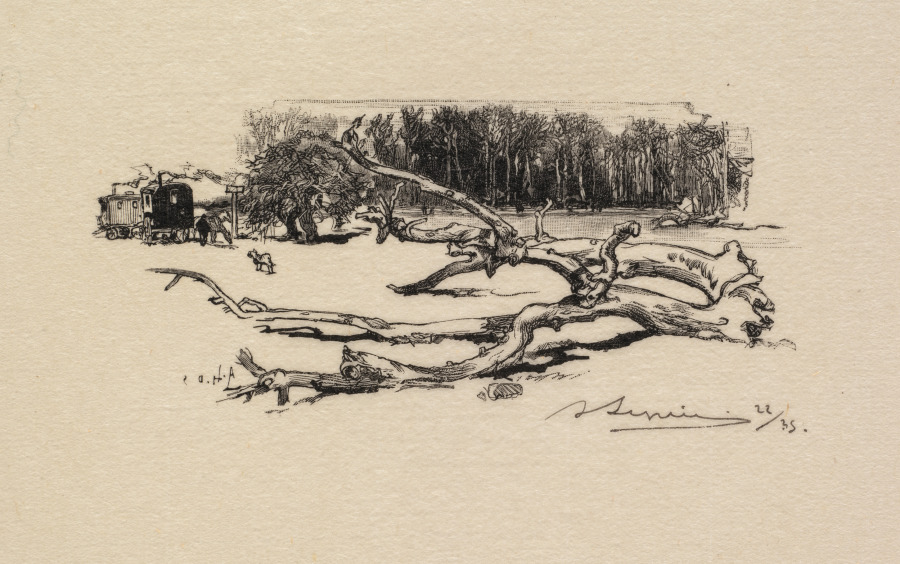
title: Fontainebleau Forest: Carrefour de l'Epine (La Forêt de Fontainebleau: Carrefour de l'Epine)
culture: France, 19th century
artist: Auguste Louis Lepère (French, 1849–1918)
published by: A. Desmoulins, Published in Revue Illustrée, 1887–90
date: 1890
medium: wood engraving from bound volume of 34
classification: Bound Volume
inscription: In block, lower left: e a. H.A; below image, lower right, in black ink: ALepère 22/35; on window mat, lower right, in graphite: Carrefour de l'Epine Image: 4.5 x 10.3 cm; sheet: the print in encapsulated in a tipped-in window mat preventing the sheet from being measured